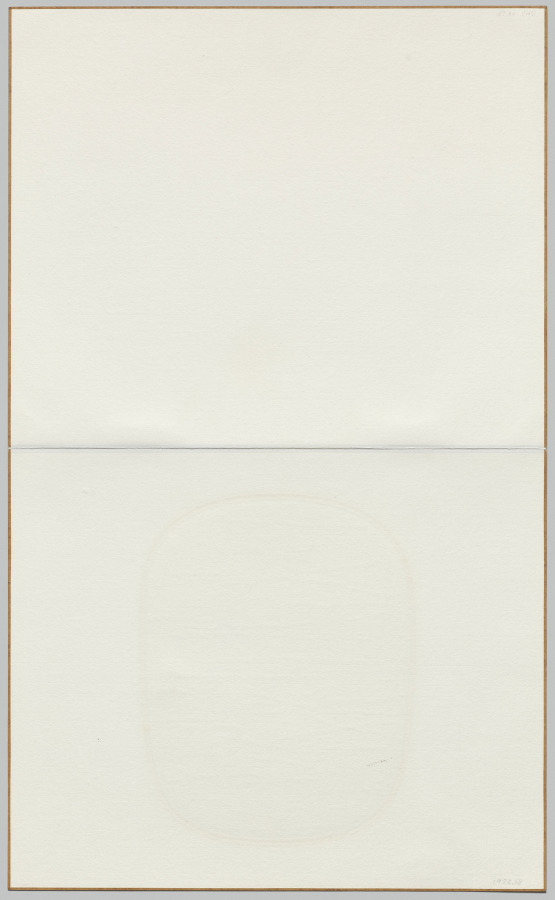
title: Boats at Anchor on West Lake at the City Gate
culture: China, Southern Song dynasty (1127-1279)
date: 1150–1200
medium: Album leaf; ink and color on silk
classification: Painting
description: Highlighted with a few bright accents, this fan painting conveys a nightly atmosphere with boats anchoring on West Lake at the foot of the city walls. Willow trees line the embankment, and the moon appears above the mountains. While the city is asleep, a figure wearing red inside a boat holds what appears to be a pipa (plucked stringed instrument), while a blue-robed gentleman nearby gazes toward the sound of music, evoking an association with Song of the Lute (Pipa xing) by Tang poet Bai Juyi (772–846) which tells the story of a romantic encounter on the Yangzi River.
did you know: The depiction of the female figure playing the pipa and the scholarly male evokes an association with a romantic encounter narrated in a well-known Tang dynasty poem.